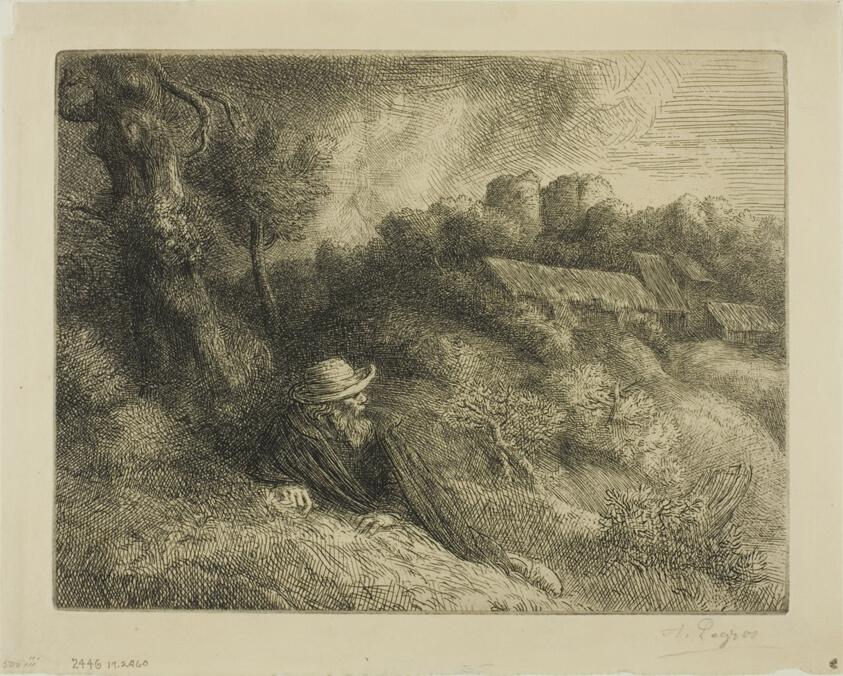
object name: Print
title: Haunted House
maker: Alphonse Legros (French, 1837-1911)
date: c. 1890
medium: Etching and drypoint on cream laid paper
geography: France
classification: etching; print; prints and drawing